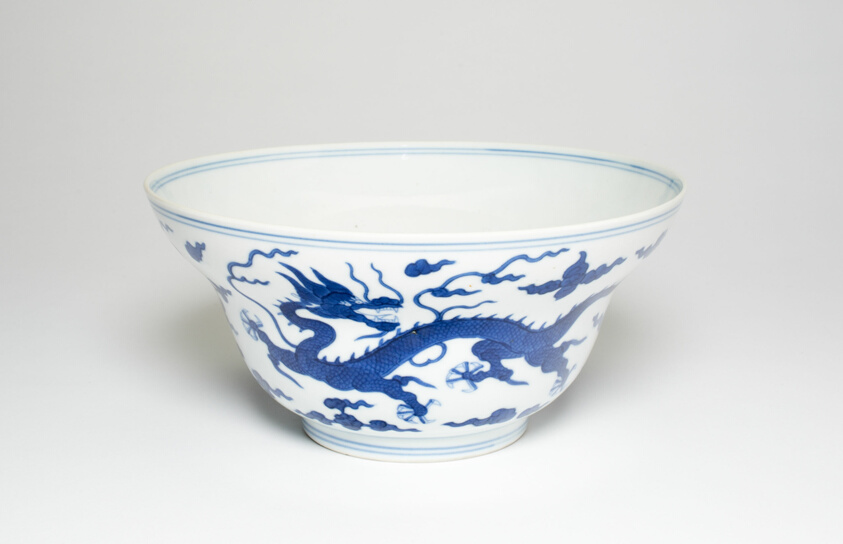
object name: Vessel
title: Bowl with Dragons amid Clouds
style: Chinese (culture or style)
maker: China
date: Qing dynasty (1644–1911), Daoguang reign mark and period (1820–1850)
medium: Porcelain painted in underglaze blue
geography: China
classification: bowl; porcelain; dish (vessel); asian art; ceramics; vessel